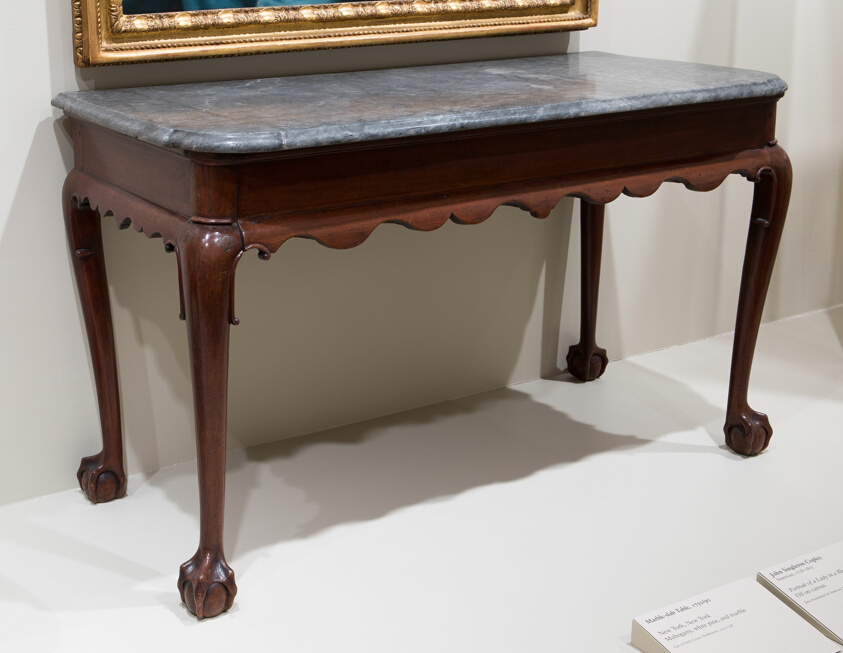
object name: Furniture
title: Marble-slab Table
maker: Artist unknown (American, 18th century); New York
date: 1750–90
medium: Mahogany, white pine, and marble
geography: New York City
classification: table; furniture; american decorative arts; american arts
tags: furniture